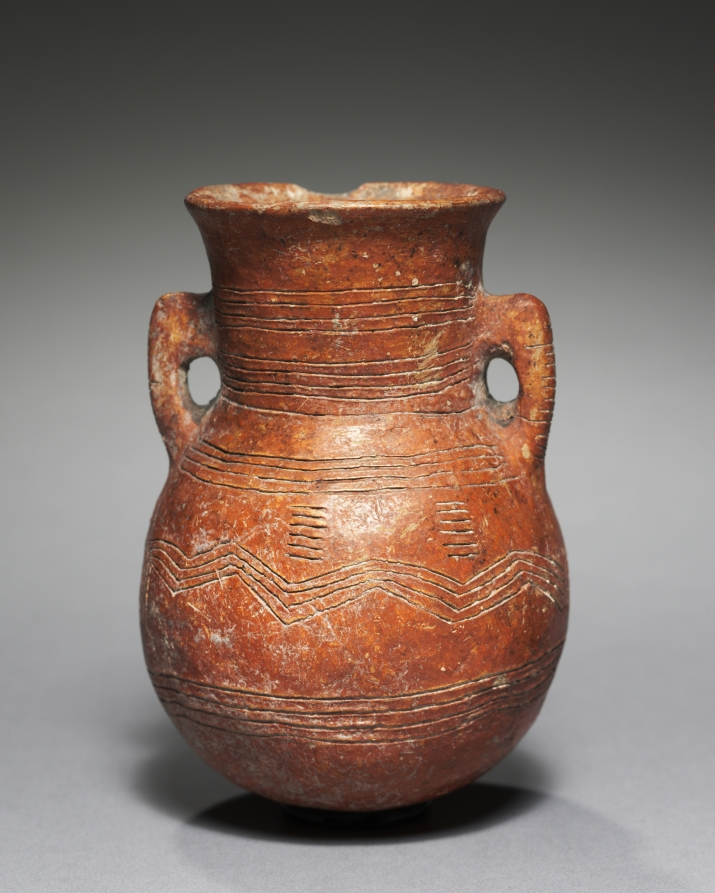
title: Amphora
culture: Cyprus, early Cypriot III–middle Cypriot I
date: c. 2000–1800 BCE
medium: red ware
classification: Ceramic